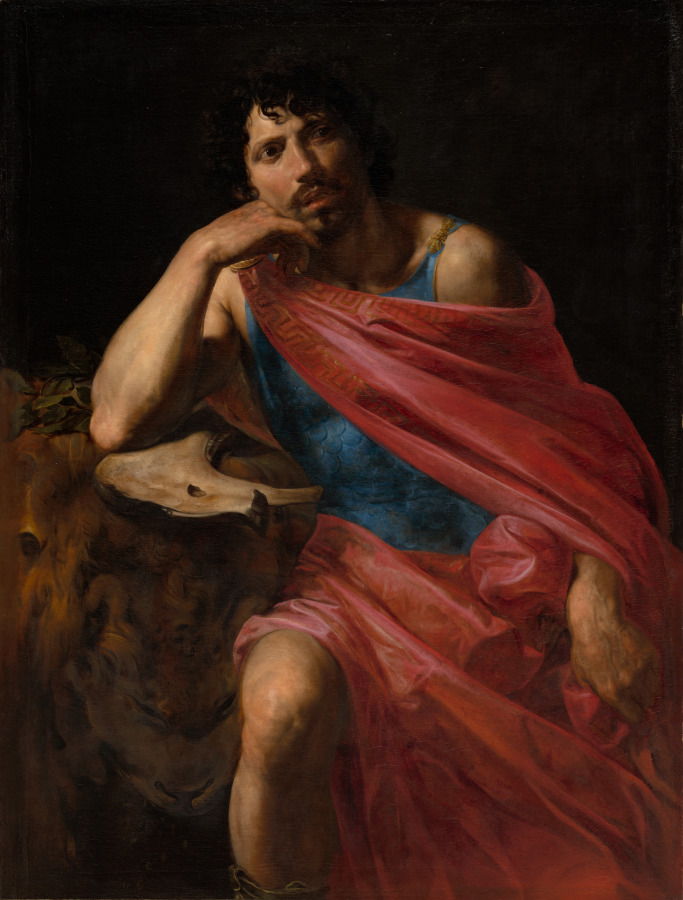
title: Samson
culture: France, 17th century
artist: Valentin de Boulogne (French, 1591–1632)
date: 1630–31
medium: oil on canvas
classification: Painting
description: The Old Testament hero Samson rests his head on his hand in a pensive, even melancholic pose. Objects on the table recall two of his heroic deeds: he killed a lion with his bare hands, and liberated the Israelites by slaughtering a thousand Philistines with a donkey’s jawbone. Samson’s cuirass, or breastplate, is joined at the shoulder by a clasp in the form of two bees—the emblem of the Barberini family, who commissioned the painting around 1630. In 1627, the Barberini had engaged Valentin to paint another biblical hero, David victorious with the head of Goliath; the canvas depicting Samson was designed to be its pendant.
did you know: The figure of Samson was likely a self-portrait of the artist.